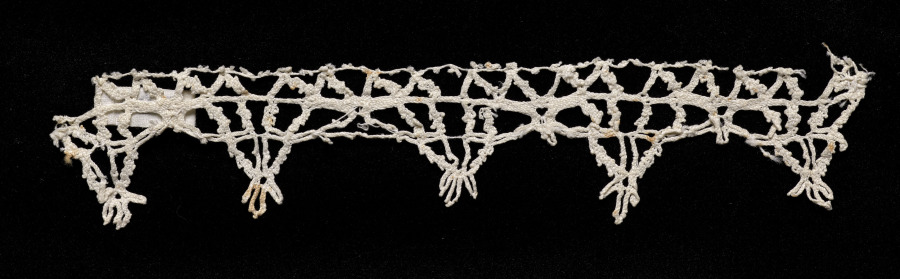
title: Lace Edging of Points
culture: Italy, Venice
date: 1540–60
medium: Bobbin lace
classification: Lace